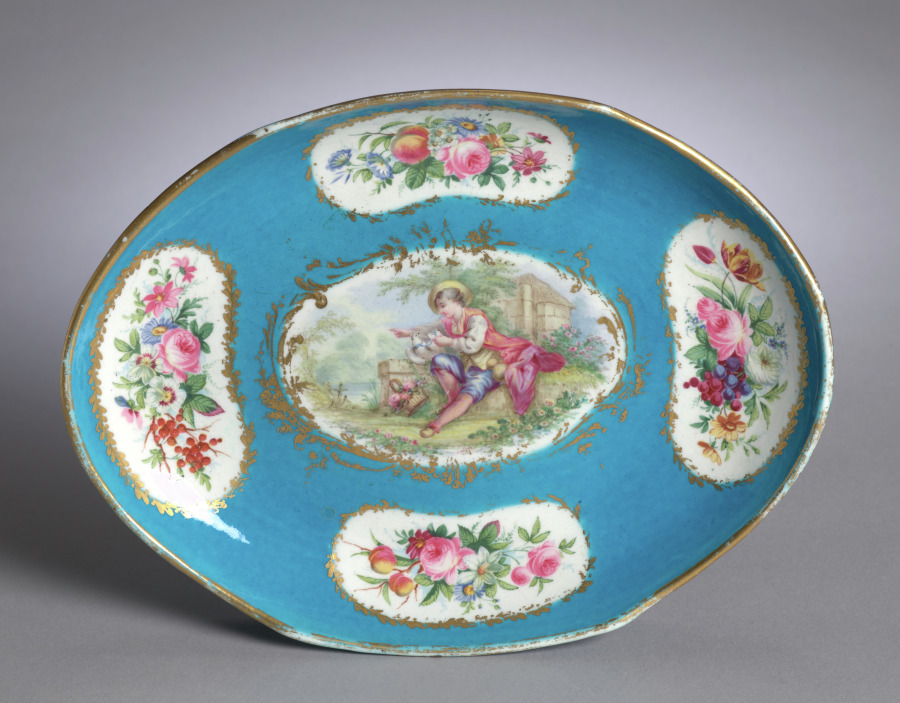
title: Dish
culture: France, Sèvres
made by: Sèvres Porcelain Factory (French, est. 1756)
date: 1800s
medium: porcelain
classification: Ceramic